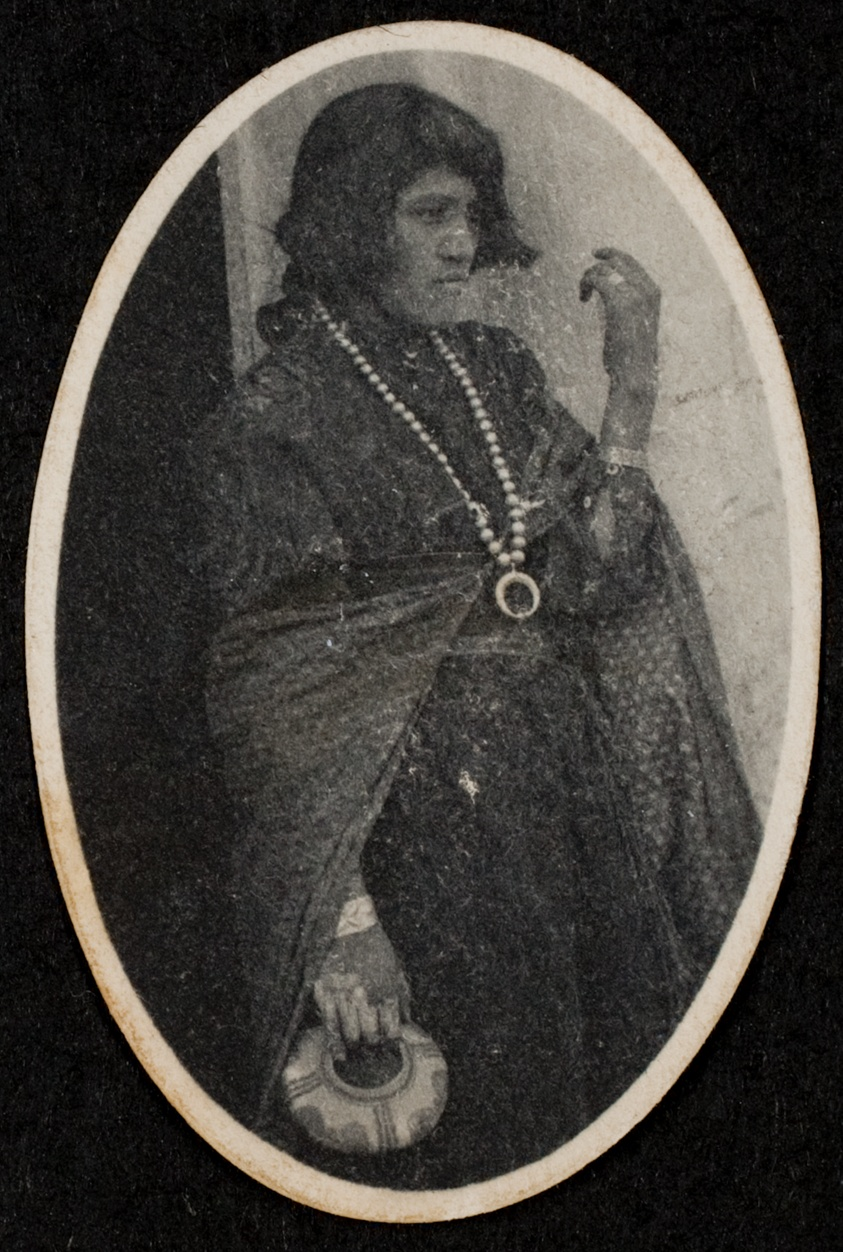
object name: Photograph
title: Queen Chewa of Tewa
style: 19th century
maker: Adam Clark Vroman (American 1856–1916)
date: n.d. (c. 1900)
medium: Platinum print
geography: United States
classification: photograph; photography